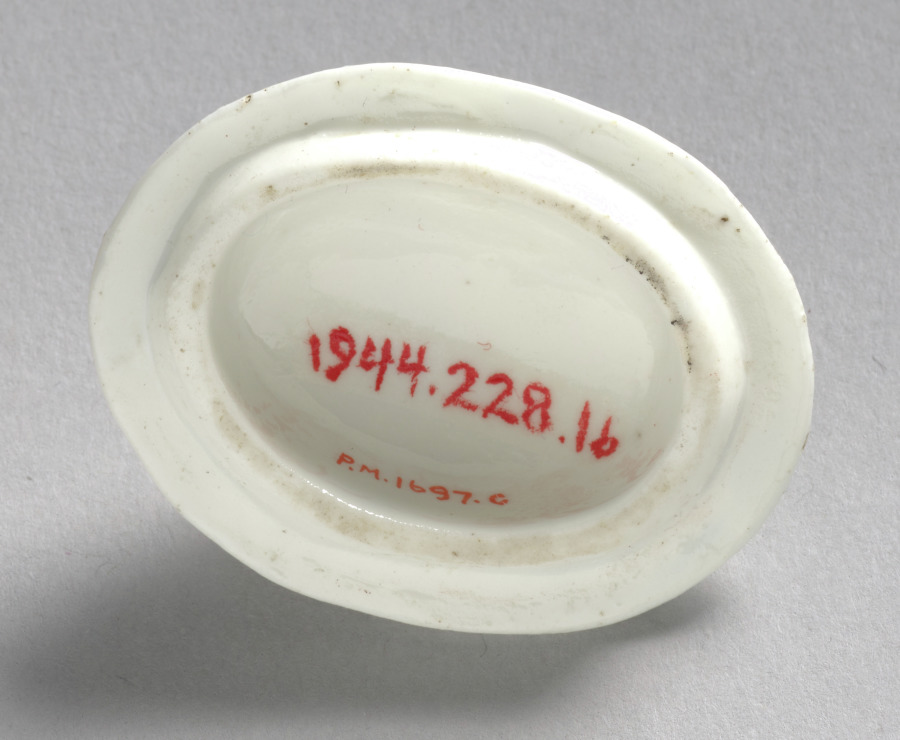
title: Teapot (cover)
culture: France, Chantilly, 18th century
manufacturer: Chantilly Porcelain Factory (French)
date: c. 1730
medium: soft-paste porcelain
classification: Ceramic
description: The pieces composing this individual tea set are entirely typical of Chantilly soft-paste porcelain in the Kakiemon style. Both the form and decoration of these pieces were inspired by Japanese prototypes. The use of knobs in the form of trumpet-shaped blossoms is characteristic of Chantilly wares.